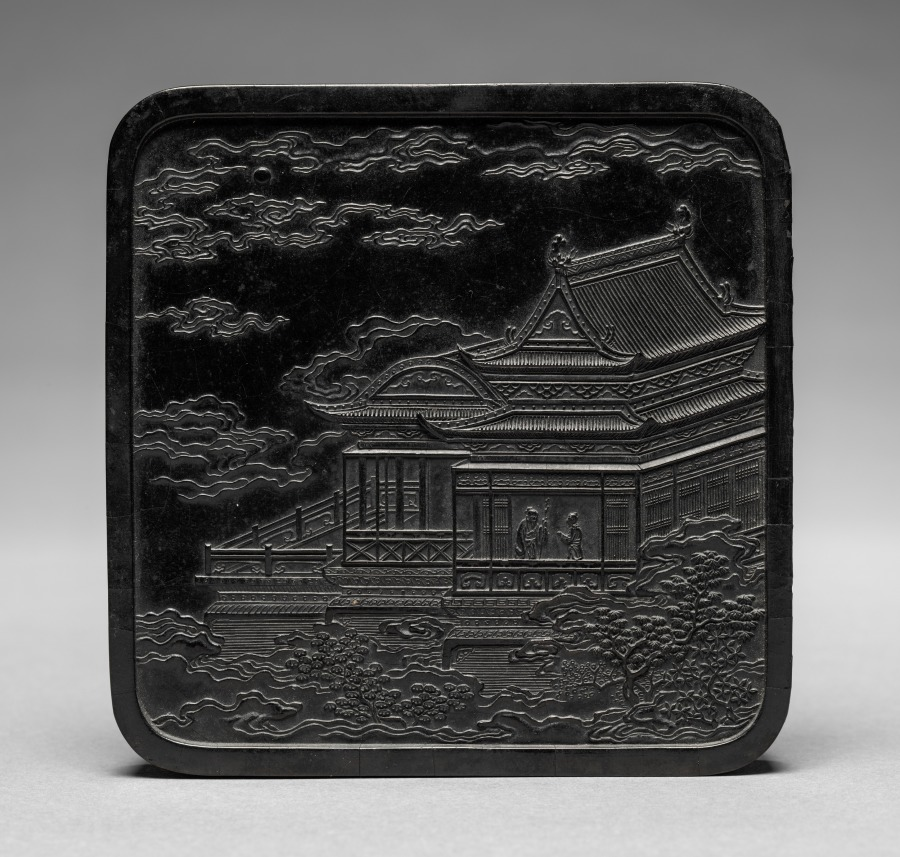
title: Ink Cake with Architectural Design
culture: China, Qing dynasty (1644-1911), Qianlong inscription, mark, and reign (1736-95)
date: 1736–95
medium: molded ink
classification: Miscellaneous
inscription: 大清乾隆年制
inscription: 待月樓珍藏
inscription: 御墨. 光分太乙. 吟詠春風里.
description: In China, access to political power was granted to those who passed the civil service examinations, a system that offered official service only at a high level of education. Chinese literati-officials, whose daily routine involved administrative work in an office, enjoyed precious objects on their writing desks that offered distraction and demonstrated good taste. By the Ming (1368–1644) and Qing (1644–1911) dynasties, these utensils of the literati studio also became collectibles and were treasured as artworks.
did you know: To make liquid ink, an ink cake is ground against an inkstone with a small quantity of water.